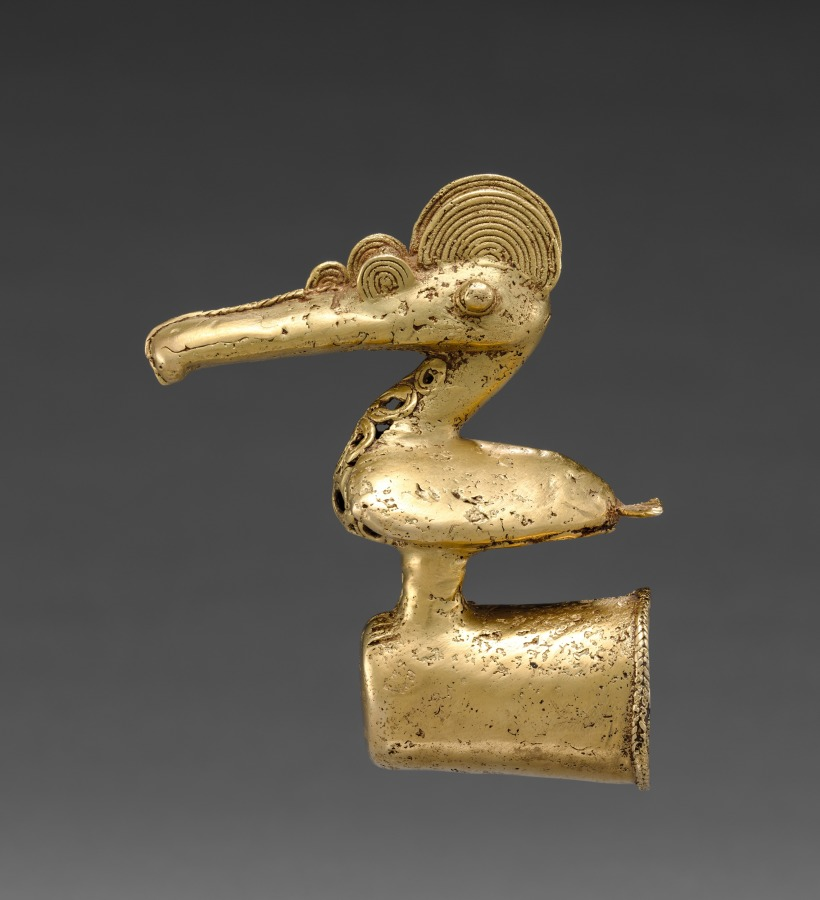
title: Finial with Long-Beaked Bird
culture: Isthmian Region (Colombia), Sinú (Zenú), 5th century-11th century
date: 400–1000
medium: gold, cast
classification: Metalwork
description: Unique to Colombia's Sinú region are gold finials with sculptural images at right angles to thimble-like caps; the caps fit over the end of a staff, an emblem of rank that may have been held horizontally. This impressive finial features a dignified, long-beaked bird whose body contains a pellet that rattles when the finial moves. Sinú animal imagery is understudied but may relate to beliefs about the cosmos. For instance, contemporary natives attribute importance to birds because they have the capacity to move among different environments (air, land, water); they may have been regarded as mediators among levels of the cosmos.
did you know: Birds, particularly water birds, may have been thought to travel between the different layers of the universe.